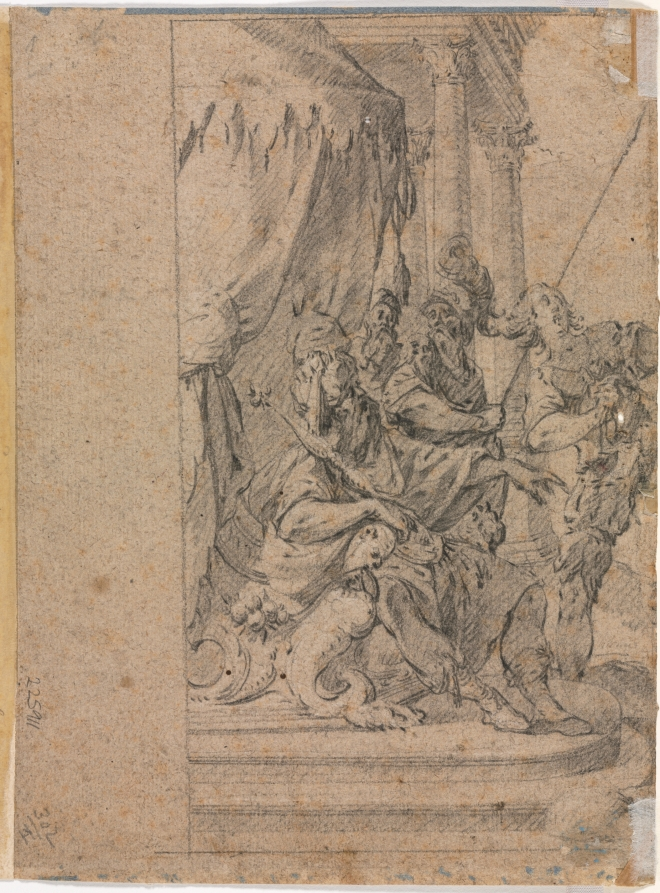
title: Panthea before Cyrus? (verso)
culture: France, 17th century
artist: Michel Dorigny (French, 1617–1665)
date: 1655–1660?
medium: black chalk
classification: Drawing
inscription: verso, lower left, in graphite: 225911 [sideways]; lower left, in graphite: 302 [underlined] / 1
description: Dorigny was the collaborator and son-in-law of Simon Vouet, the leading painter working in Paris in the mid-1600s. Their drawing styles are similar, and this sheet was once attributed to Vouet. However, the airy, floating drapery, firm contour lines, and regular parallel hatching lines are all typical of Dorigny's technique in black chalk. Although we do not know of a painting to which this drawing relates, the flying angels indicate that Dorigny had a religious subject in mind when he drew them.